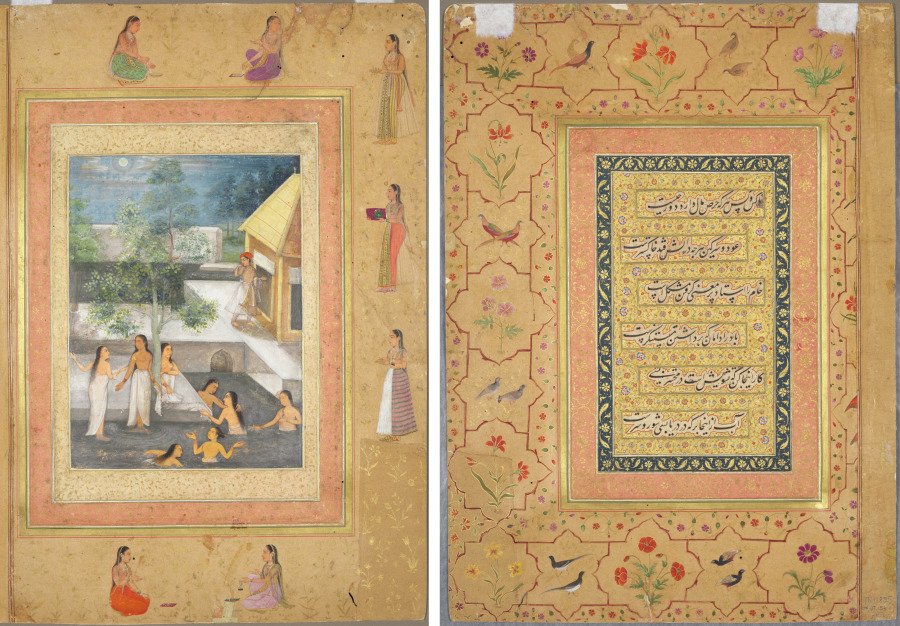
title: Leaf from the Late Shah Jahan Album: Harem Night-Bathing Scene (recto); Calligraphy Framed by an Ornamental Border of Flowers and Birds (verso)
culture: Mughal India, court of Shah Jahan (reigned 1628–58)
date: c. 1650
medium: Gum tempera, ink, and gold on paper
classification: Painting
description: The subject of women bathing persisted throughout the 1500s and into the 1600s. Akbar’s grandson Shah Jahan—the Mughal emperor who built the Taj Mahal—continued to support the work of artists in the imperial atelier. His taste was more formal and subdued, without as much interest in illuminations of fantastic tales. This scene is a single painting mounted in an album. The white marble terraces glow under the moonlight. An attendant carrying a cloth over one arm looks on with awe at the beauty of the scene. He is probably a eunuch, since men were not permitted to serve in the women’s quarters of a Mughal palace.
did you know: The lone male figure points to his mouth in a gesture of astonishment, perhaps at the beauty of the scene.